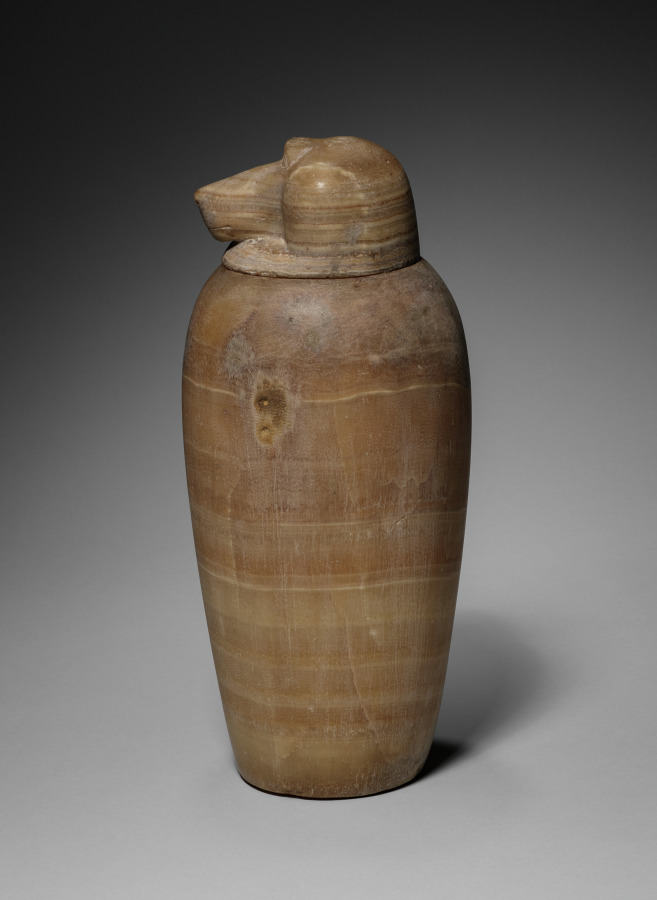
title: Canopic Jar with Baboon's Head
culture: Egypt, Late period (715–332 BCE), Dynasty 26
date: 664–525 BCE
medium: travertine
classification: Funerary Equipment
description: In the process of mummification, the liver, lungs, stomach, and intestines were removed, separately embalmed, and stored in specialized jars known as canopic jars (after a sailor in Greek mythology, who died at the town of Canopus in the Nile Delta and was worshipped there in the form of a human-headed jar). Each organ was identified with one of four funerary deities collectively known as the Sons of Horus: the liver with Imsety (man's head), the lungs with Hapy (baboon's head), the stomach with Duamutef (jackal's head), and the intestines with Qebehsenuef (falcon's head). It was their duty to protect the deceased and restore to him his body parts in the hereafter.